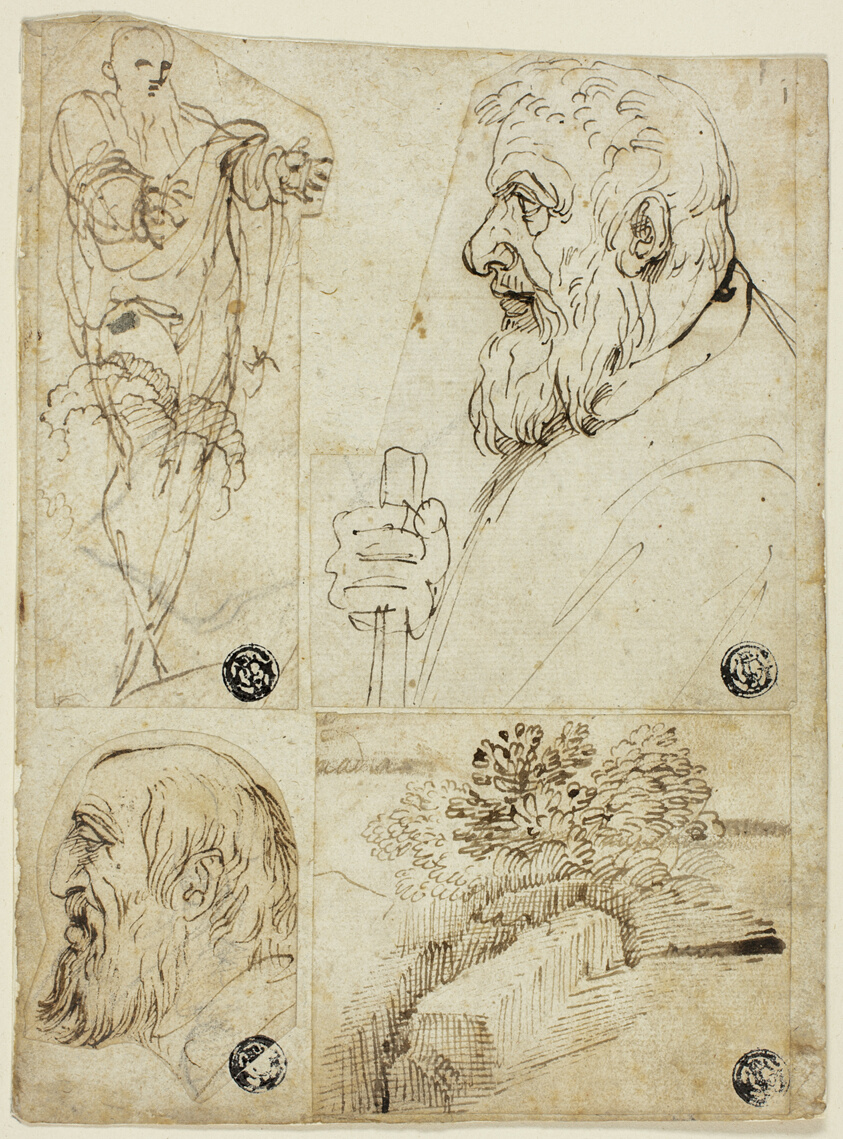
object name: Drawing and Watercolor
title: Four Sketches: Standing Male Figure; Profile Bust of Bearded Man; Profile Head of Bearded Man; Landscape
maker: Attributed to Agostino Carracci; Italian, 1557-1602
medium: Pen and brown ink, with traces of brush and brown wash, over black chalk, on ivory laid paper, pieced together and laid down on ivory laid paper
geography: Italy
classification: pen and ink drawings; drawings (visual works); prints and drawing